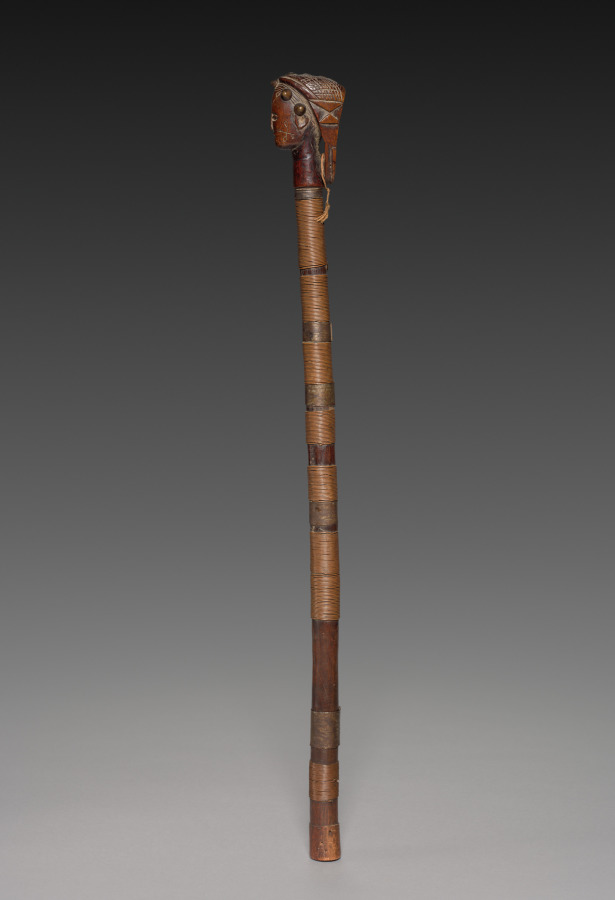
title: Scepter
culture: Africa, Central Africa, Angola, Ovimbundu-style maker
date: late 1800s or early 1900s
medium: Wood, copper alloy, upholstery studs, iron alloy, and cotton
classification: Implements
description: Staffs and scepters as well as tobacco pipes and mortars are among the most important sculptural creations to stem from the Ovimbundu peoples, a Central African culture. All of these object types have associations with ideas of class, status, and power. This scepter has a handle wrapped in thin copper wire that forms wide bands of alternating metal and wooden passages. Its finial is a human head whose carved headdress or hairstyle is ornamented with round-headed metal tacks.